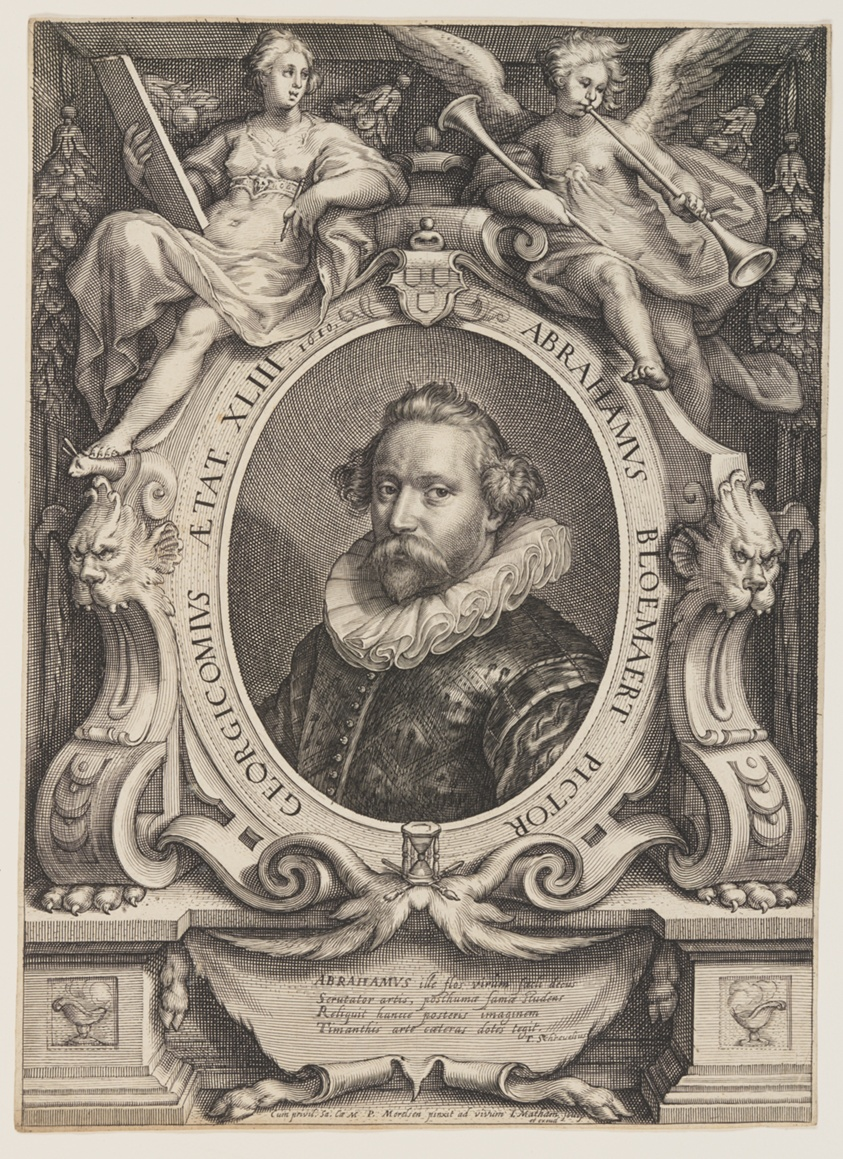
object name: Print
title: Abraham Bloemaert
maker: Jacob Matham (Dutch, 1571–1631); after Paulus Moreelse (Dutch, 1571-1638)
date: 1610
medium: Engraving on ivory laid paper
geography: Netherlands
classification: print; paper; prints and drawing; engraving